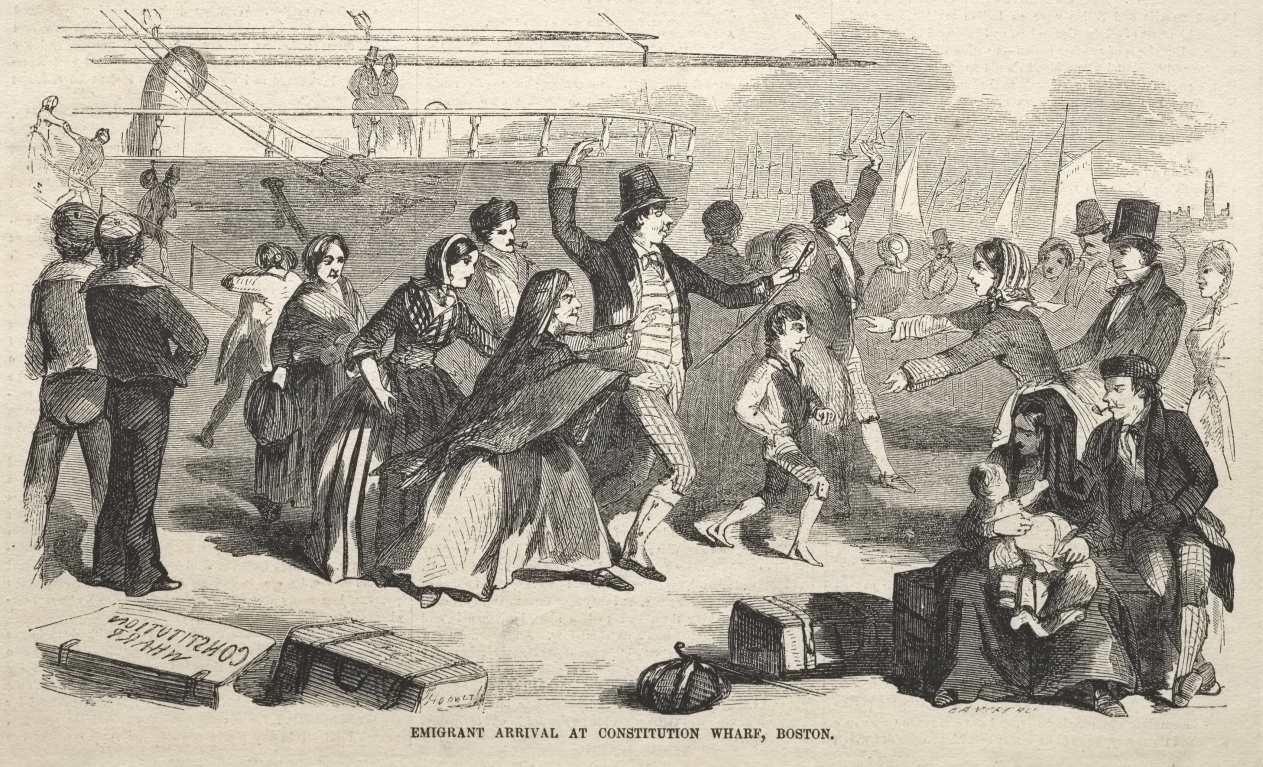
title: Emigrant Arrival at Constitution Wharf, Boston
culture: America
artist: Winslow Homer (American, 1836–1910)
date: 1857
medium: wood engraving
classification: Print